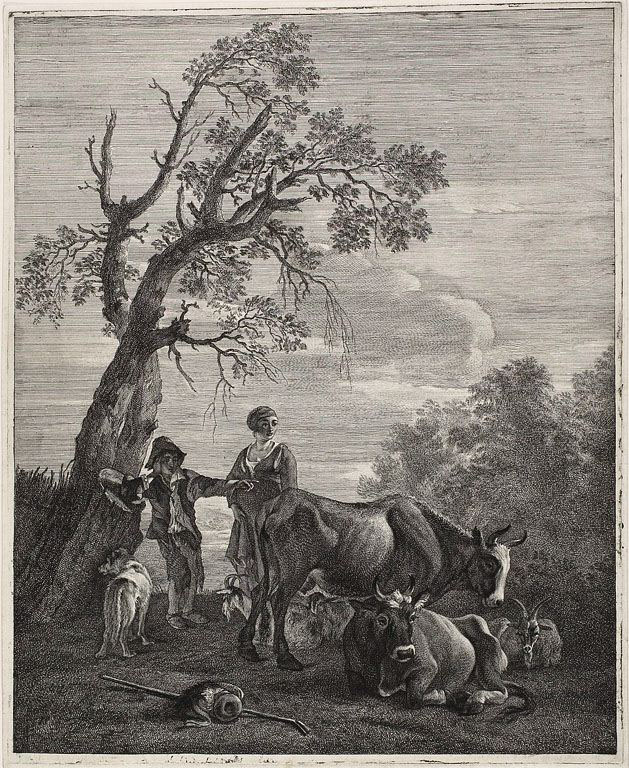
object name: Print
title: A Resting Herd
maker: Cornelis Visscher (Dutch, c. 1629-1658); after Pieter van Laer (Dutch, c. 1599-1642)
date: c. 1649-58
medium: Etching and engraving on ivory laid paper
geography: Holland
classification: engraving; print; prints and drawing